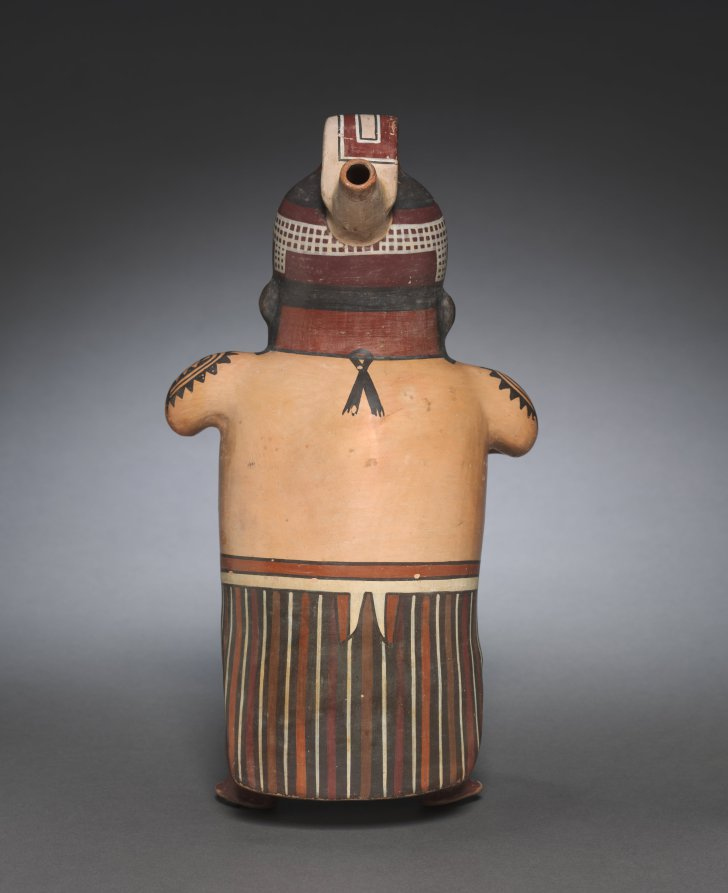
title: Male Effigy Vessel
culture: Peru, South Coast, Nasca, Early Intermediate Period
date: 100–650 CE (thermoluminescence date, 410–1010 CE)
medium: ceramic and slip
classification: Ceramic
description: The style is typically Nasca: modeling is minimal and the surface is decorated with the vibrant, earth-colored slips that are a hallmark of Nasca ceramic art. Male figures are a well-known category of Nasca ceramic production, although the shape of this one, which stands upright on two legs and is additionally supported from behind by a long loincloth, is unusual.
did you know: This figure holds a human head, which the Nasca viewed as a source of great power.